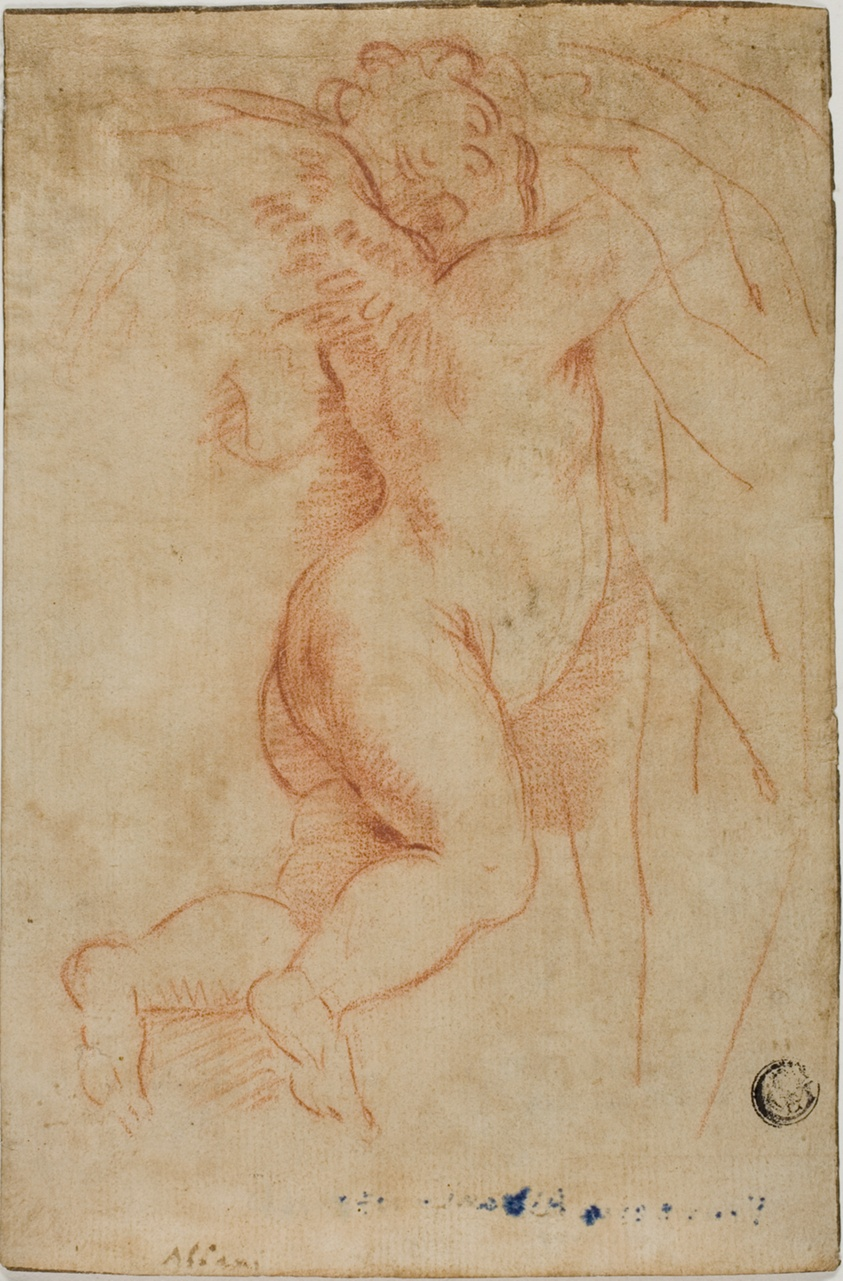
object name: Drawing and Watercolor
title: Putto Lifting Curtain (recto); Infant St. John (verso)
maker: Style of Mattia Preti (Italian, 1613-1699); or Circle of Carlo Maratti (Italian, 1625-1713); or Francesco Albani (Italian, 1578-1660)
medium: Red chalk (recto) and black chalk (verso) on tan laid paper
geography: Italy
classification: drawings (visual works); prints and drawing